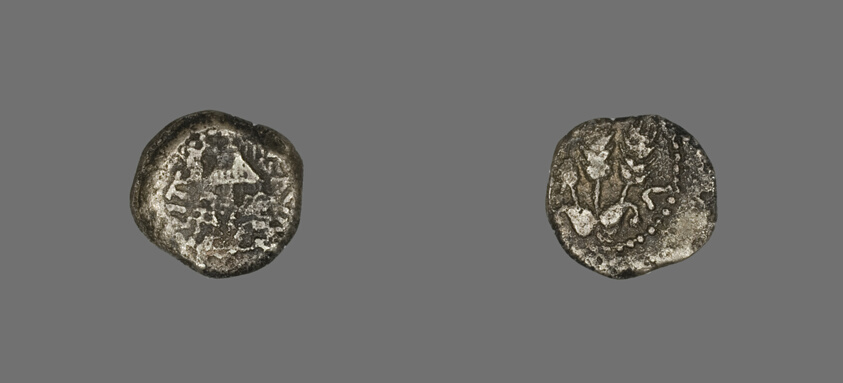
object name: Coin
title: Coin Depicting a Parasol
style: roman (ancient, style or period), ancient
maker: Roman; Palestine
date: 42-43, reign of King Herod Agrippa I (37-43)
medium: Silver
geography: Israel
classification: coin; ancient art